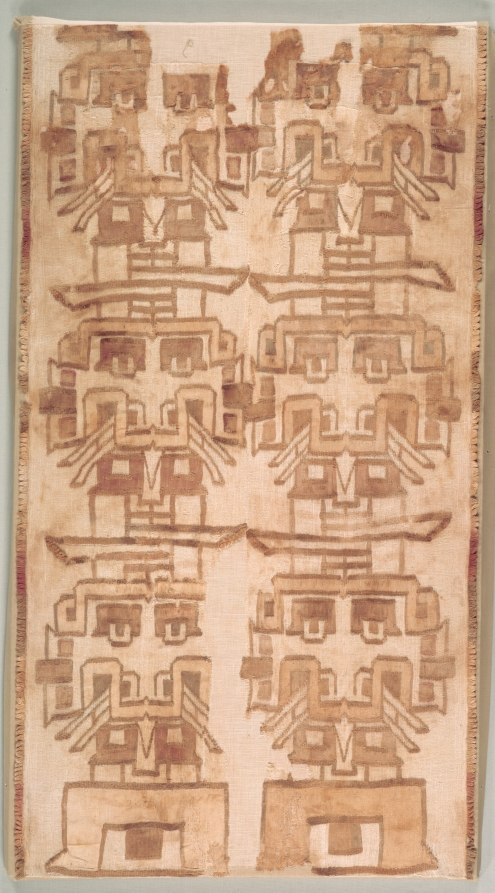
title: Two Textile Fragment with Fanged Heads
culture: Peru, South Coast, Ica Valley, Chavín style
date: 500–200 BCE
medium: cotton: plain weave patterned by fiber-wrapped warps and supplementary wefts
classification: Textile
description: These two rare fragments of equal size and mounted side by side feature fanged heads connected by a fanged mouth band. Each band ascends as a column above a rectangular, disembodied eye that implies the original presence of large figures or heads beneath the bands. Fanged heads are common markers of the supernatural in Chavín art, an early style that developed in the highlands of Peru. The original textile may have served as a ceremonial wall hanging.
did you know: Fanged heads are common markers of the supernatural in Chavín art.